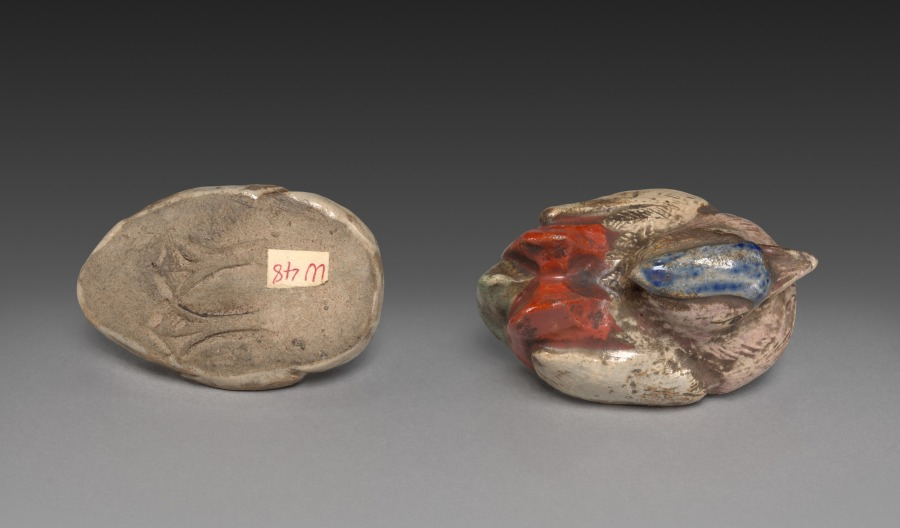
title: Incense Container (Kōgō) in the Shape of a Mandarin Duck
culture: Japan, Edo period (1615–1868)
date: c. 1700–1868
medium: Stoneware with glaze and incised decoration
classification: Ceramic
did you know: The artist incised the bird's feet on the bottom of the box.